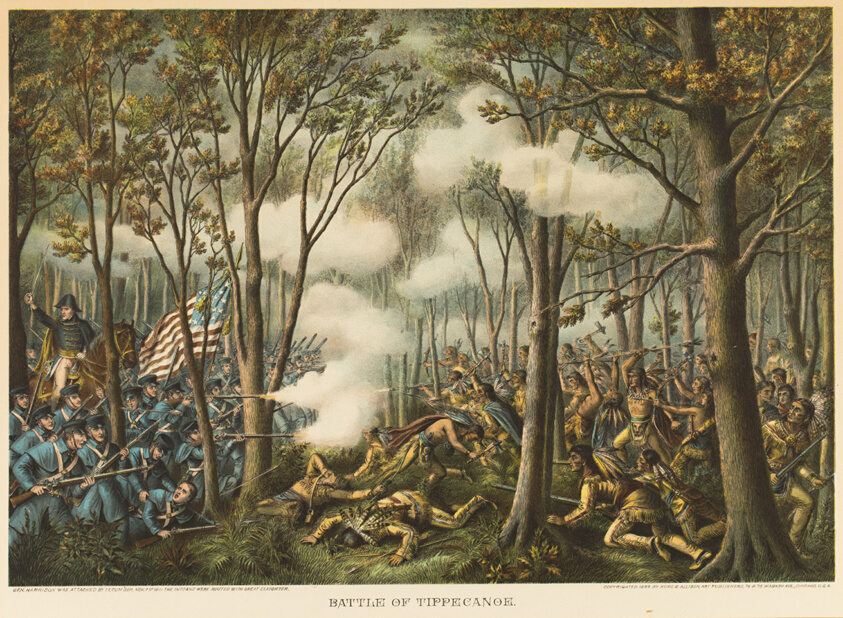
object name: Print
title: Battle of Tippecanoe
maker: Unknown Artist; published by Kurz and Allison (American, founded in Chicago, 1880)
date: 1889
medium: Color lithograph on off-white wove paper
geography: United States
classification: lithograph; print; prints and drawing